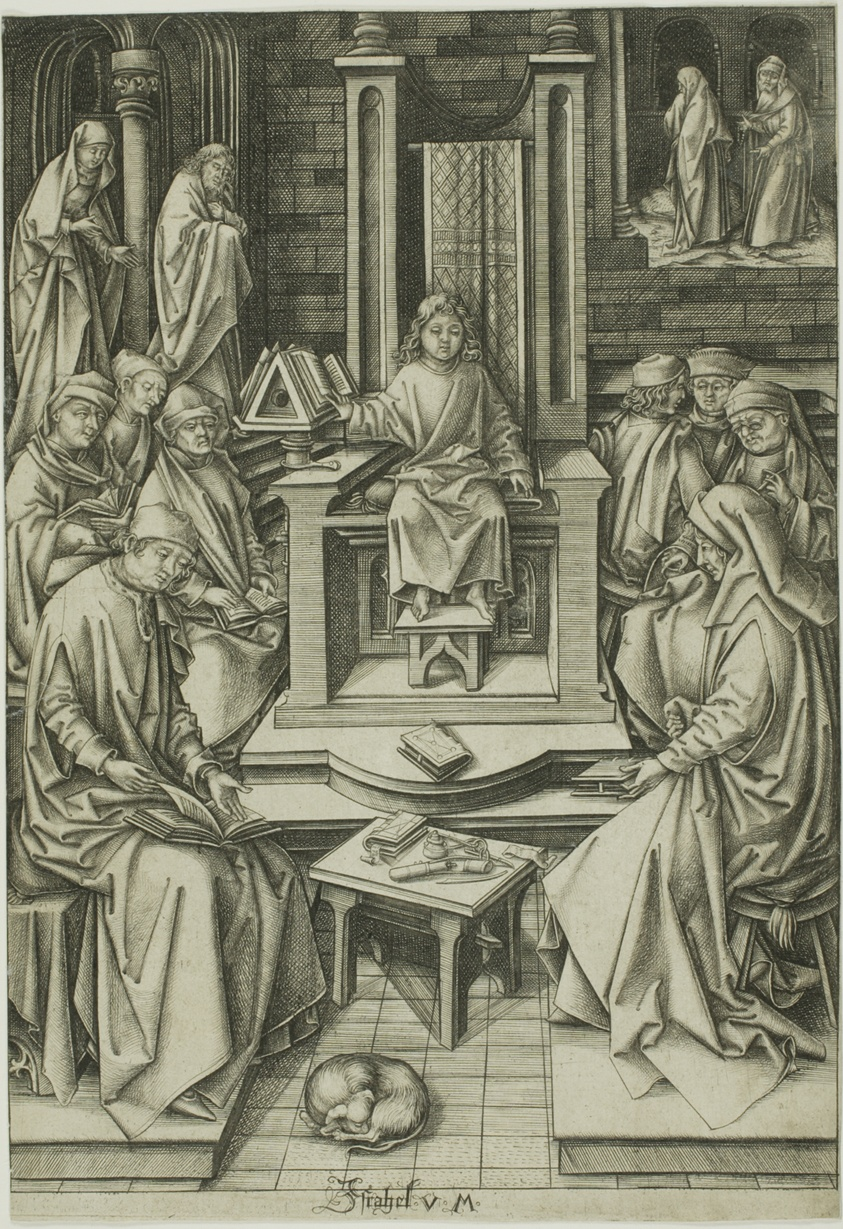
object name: Print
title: Christ Among the Doctors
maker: Israhel van Meckenem the Younger; German, c. 1440/45-1503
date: 1490–1500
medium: Engraving on paper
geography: Germany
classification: engraving; print; prints and drawing